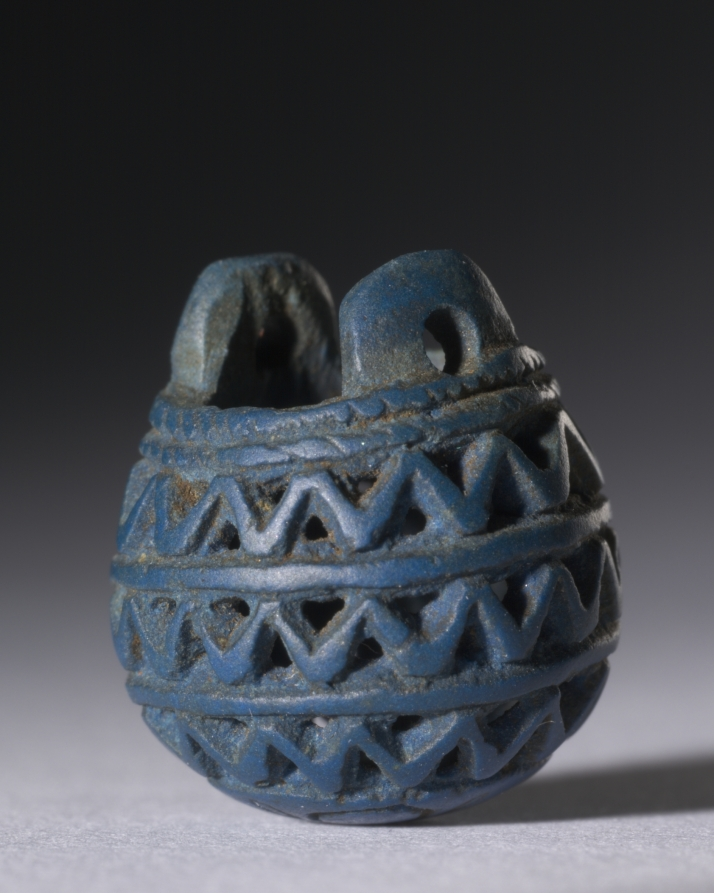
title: Model Basket as Amulet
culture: Egypt, Third Intermediate (1069–715 BCE), Dynasties 21–22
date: c. 1069–945 BCE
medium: Egyptian blue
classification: Sculpture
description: As an amulet, the basket was associated with the cat-goddess Bastet. Statuettes of Bastet frequently show her carrying basketfuls of kittens. This amulet is remarkable for its openwork design